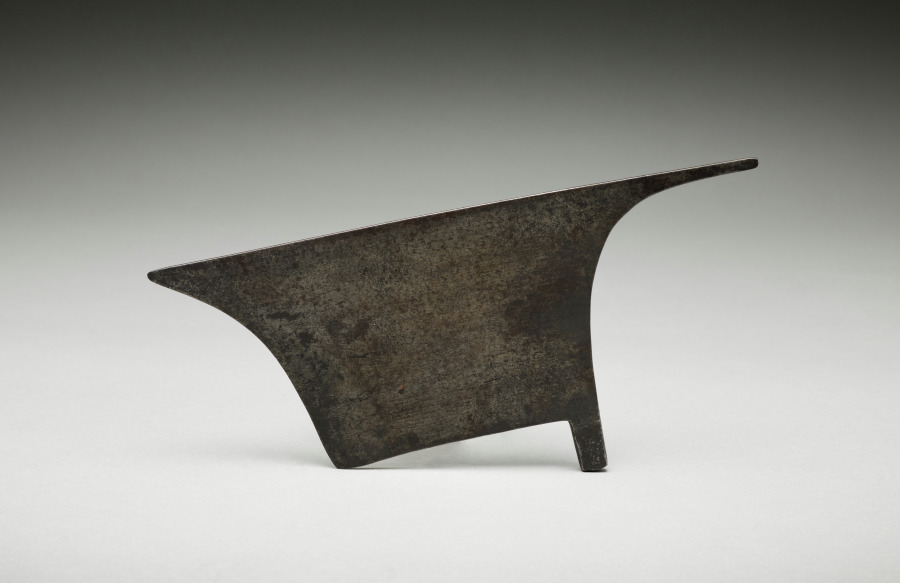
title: Head Axe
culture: Philippines, Northern Luzon, typical of Bontoc Province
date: before 1922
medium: Blade: metal; handle: wood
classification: Arms and Armor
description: This iron blade belongs to a Bontoc head axe, a northern Luzon weapon known for its heavy, compact form. The broad, triangular cutting surface, long, tapering rear spike, and short lower tang built to slot into a wooden shaft are all characteristic of northern Luzon. The shaft includes a protruding “thorn” or finger stop that provided a secure grip.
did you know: Though designed for severing a head, this hatchet also served utilitarian purposes, such as climbing.